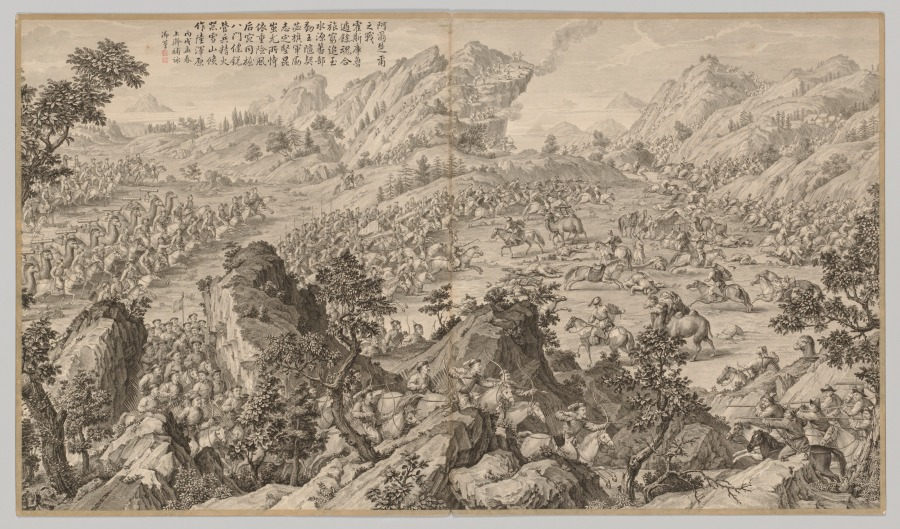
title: Battle at A'erchu'er: from Battle Scenes of the Quelling of Rebellions in the Western Regions, with Imperial Poems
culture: China, Qing dynasty (1644–1911), Qianlong reign (1736–95)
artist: Jean Damascene Sallusti (Italian, d. 1781)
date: c. 1765–74; poem dated 1766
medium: etching, mounted in album form, 16 leaves plus two additional leaves of inscriptions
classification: Print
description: This set of etchings was commissioned by Emperor Qianlong to record in pictorial terms the courage of his generals and soldiers in quelling the rebellions in the Western Regions. Qianlong added his own poem to each of the etchings, indicating his appreciation and pride in this demonstration of military might. "Western Regions" refers to the present-day Xingjiang province, often described in Western writing as "Central Asia."